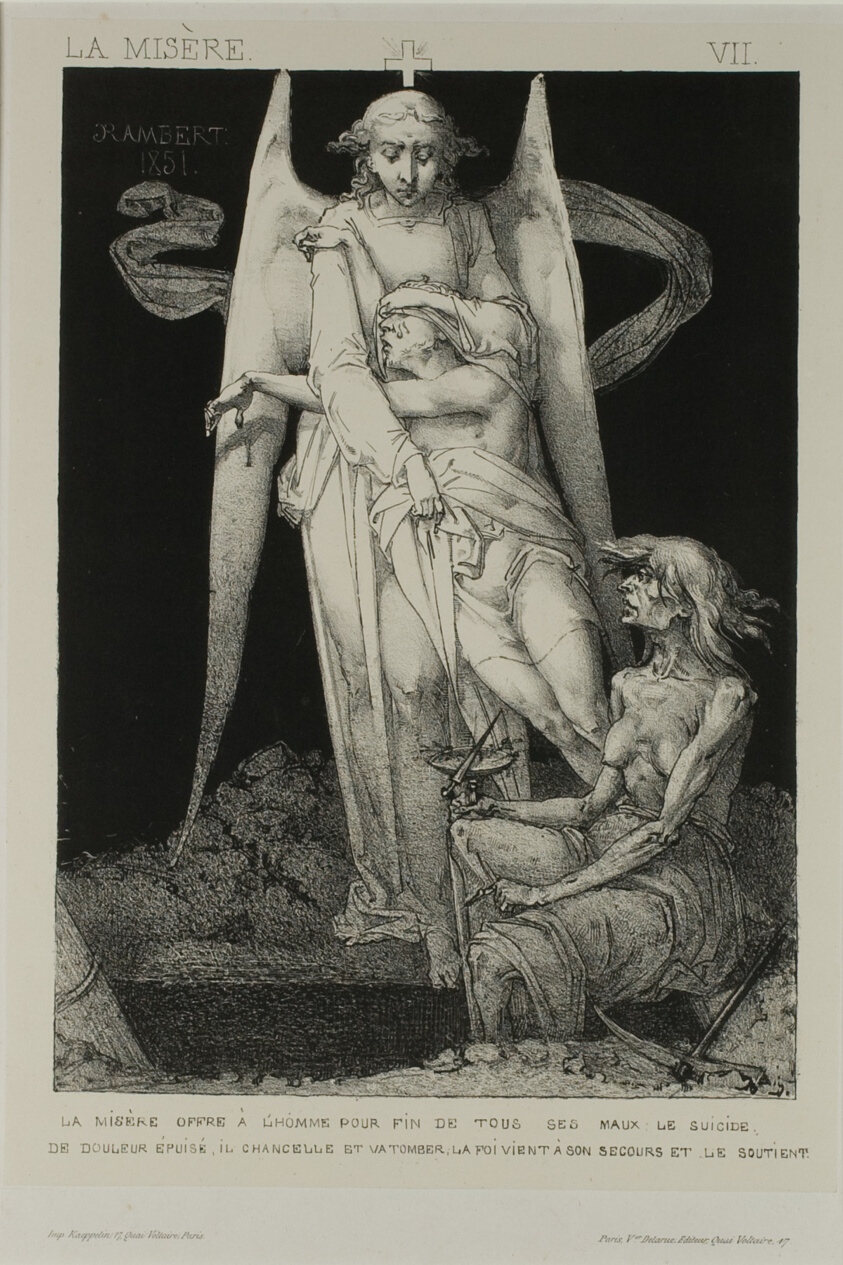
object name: Print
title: Plate Seven from Misery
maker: Charles Rambert (French, active 1836–1867); printed by Kaeppelin; published by Victor Delarue (French, 19th century)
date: 1851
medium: Lithograph in black on cream China paper, laid down on ivory wove paper (chine collé)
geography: France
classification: lithograph; print; prints and drawing